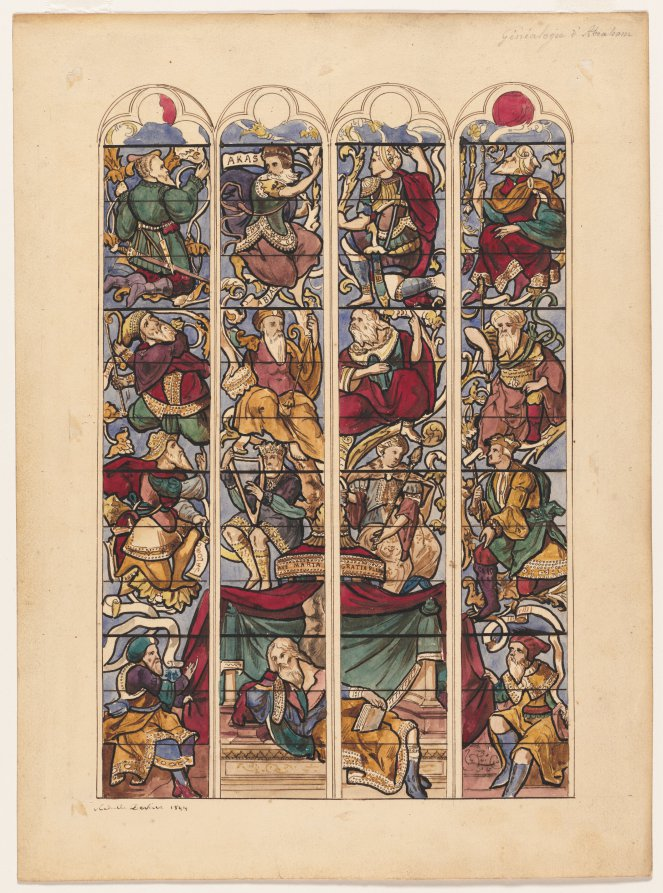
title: Study for Four Stained Glass Windows "Généalogie d'Abraham"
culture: France, 19th century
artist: Achille Devéria (French, 1800–1857)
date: 1844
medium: black and brown ink, watercolor with graphite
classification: Drawing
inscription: Signed and dated lower left in brown ink: Achille Déveria 1844 Inscribed upper right in graphite: Généalogie d'Abraham